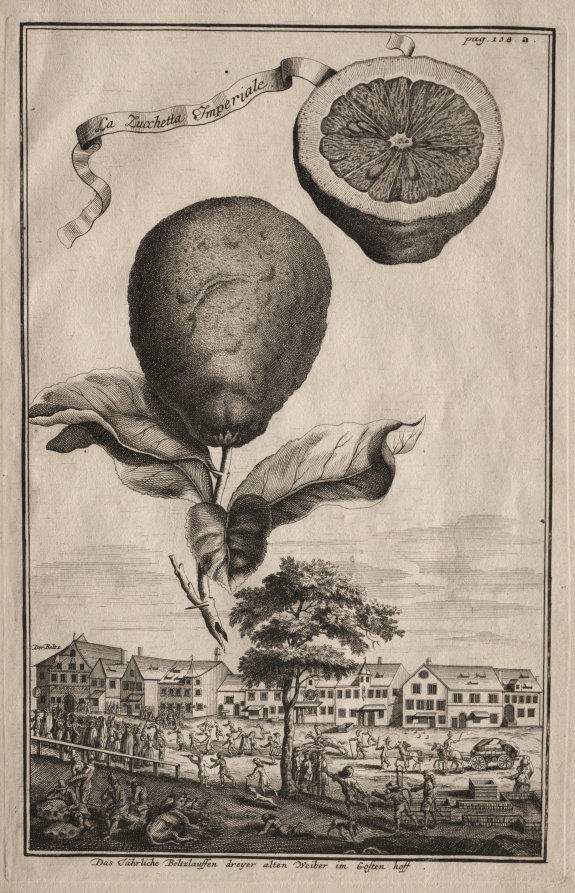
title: Nurnbergische Hesperides: La Luchetta Imoperiale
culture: Hungary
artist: Joseph de Montalegre (Hungarian)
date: 1714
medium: etching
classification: Print